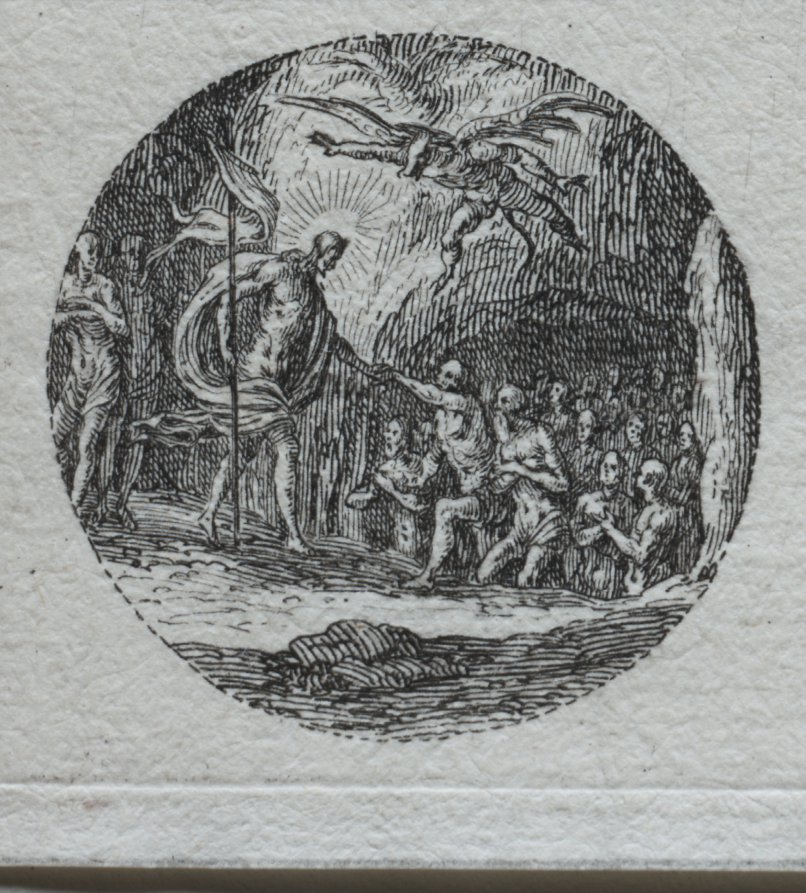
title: The Mysteries of the Passion: The Descent into Limbo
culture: France, 17th century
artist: Jacques Callot (French, 1592–1635)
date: 1631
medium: etching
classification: Print